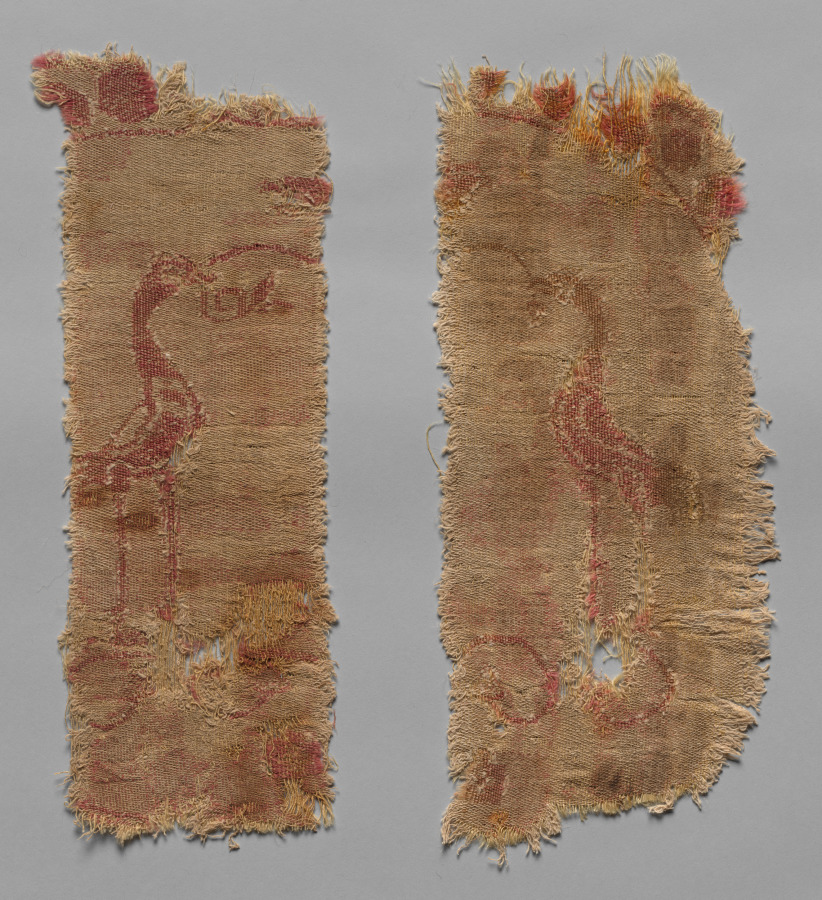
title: Two Fragments of Large Scale Roundel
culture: Iran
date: 600s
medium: compound twill; wool and cotton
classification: Textile